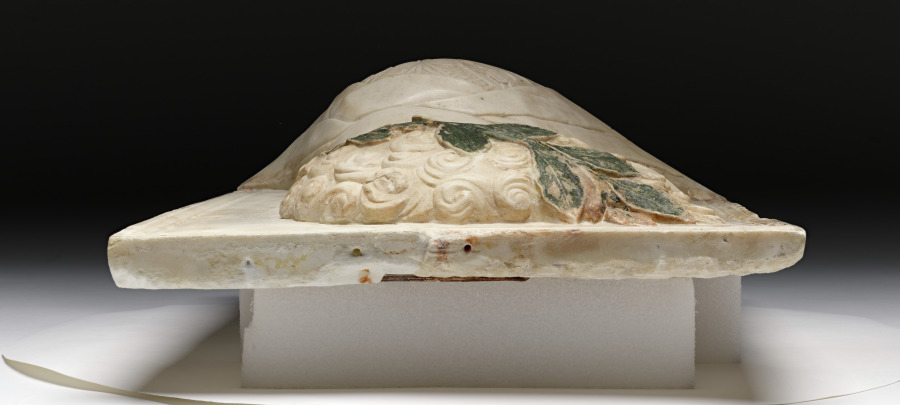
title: Aurelius Antoninus Pius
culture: Italy, Lombard School, late 15th century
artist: Gregorio di Lorenzo (Italian, c. 1436–1504)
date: late 1400s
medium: marble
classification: Sculpture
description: A laurel wreath rests on this Roman emperor’s finely articulated corkscrew curls, underscoring his military triumphs. While many ancient and classically inspired marble sculptures were painted, the survival of pigments is rare. In addition to the vibrant green coloring, traces of gold also remain on the leaves.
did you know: The artist can be identified by his distinctive flame-shaped curls forming the beard.